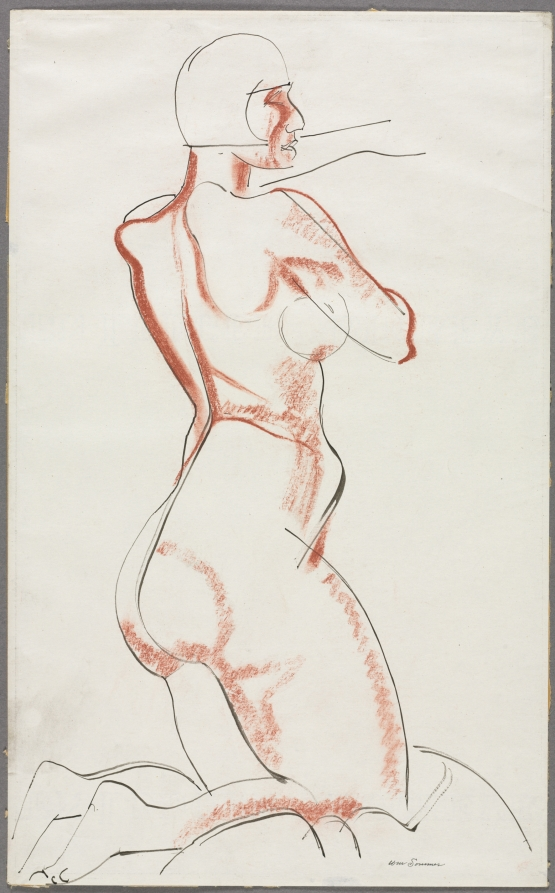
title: Nude Figure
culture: America, Ohio, Cleveland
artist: William Sommer (American, 1867–1949)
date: c. 1927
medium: sanguine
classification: Drawing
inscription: In ink, lower right: "Wm. Sommer (signed)"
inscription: Watermark across top and bottom: "EN LEDGER BUCKEYE"